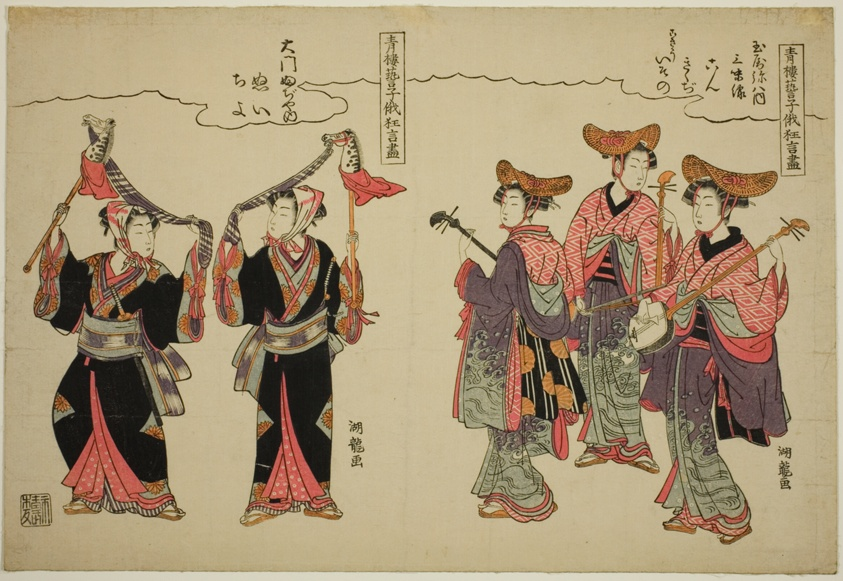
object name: Print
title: Musicians from Tamaya Yahachi and hobby-horse dancers from Daimon Fujiya, from the series "Comic Performances by the Entertainers of the Pleasure Quarters at the Niwaka Festival (Seiro geiko niwaka kyogen zukushi)"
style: Japanese (culture or style)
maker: Isoda Koryusai (Japanese, 1735-1790)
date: c. 1776/81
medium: Color woodblock print; uncut chuban diptych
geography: Japan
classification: woodblock print; print; asian art